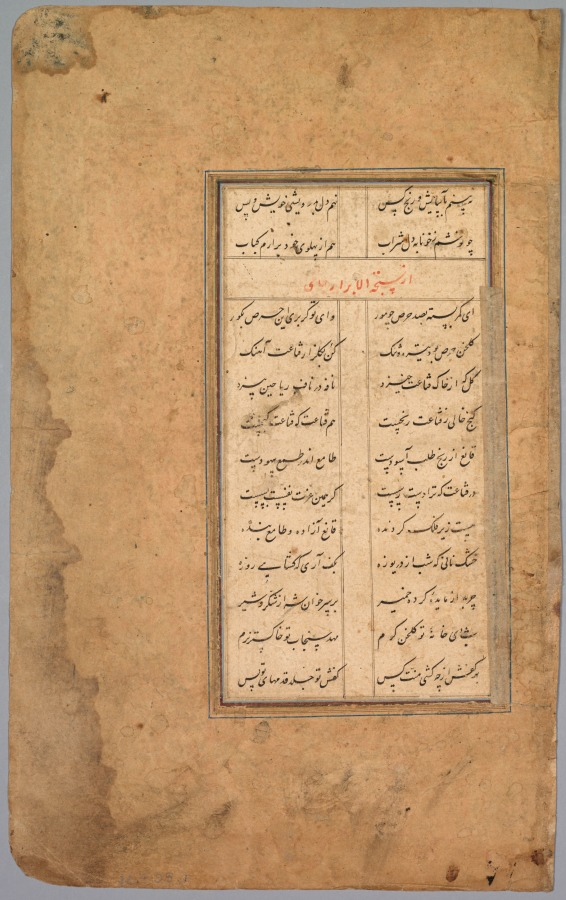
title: School Exercise Alphabet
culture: India, Mughal Dynasty (1526–1756)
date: 1700s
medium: ink on paper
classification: Manuscript